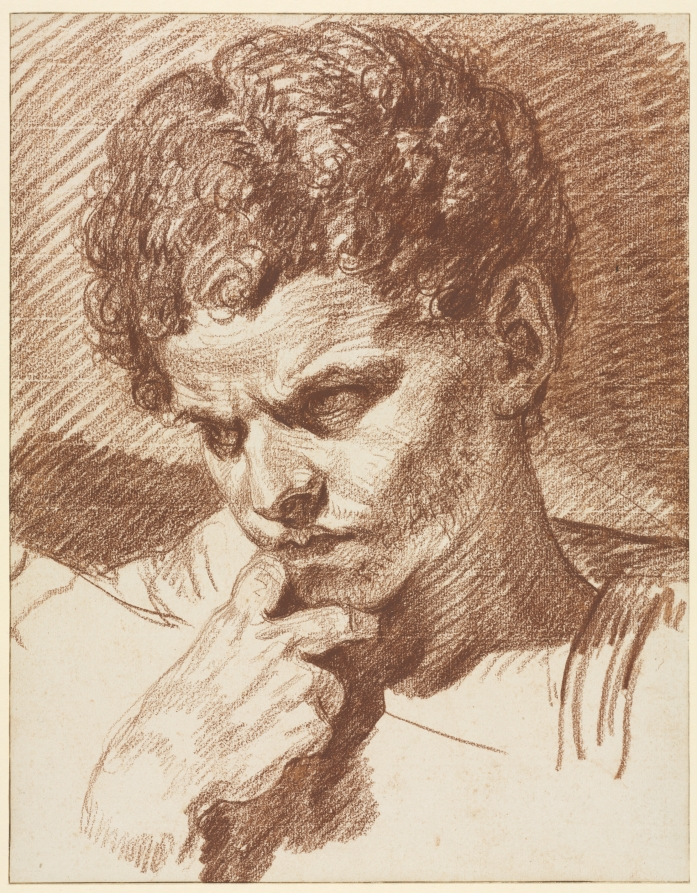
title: Head of Caracalla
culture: France, 18th century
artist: Jean-Baptiste Greuze (French, 1725–1805)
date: c. 1768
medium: Red chalk on cream laid paper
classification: Drawing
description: As part of their training in the late 18th century, French artists practiced drawing têtes d'expression, or expressive heads, that display subtleties of human emotion. Greuze made this chalk study in preparation for a painting in which the Roman emperor Septimius Severus rebukes his notoriously ruthless son, Caracalla, for attempting to assassinate him. Although Greuze based this face for the figure of Caracalla on a Roman portrait bust, he imaginatively adapted the facial expression to dramatize Caracalla’s resentment and humiliation during the confrontation.